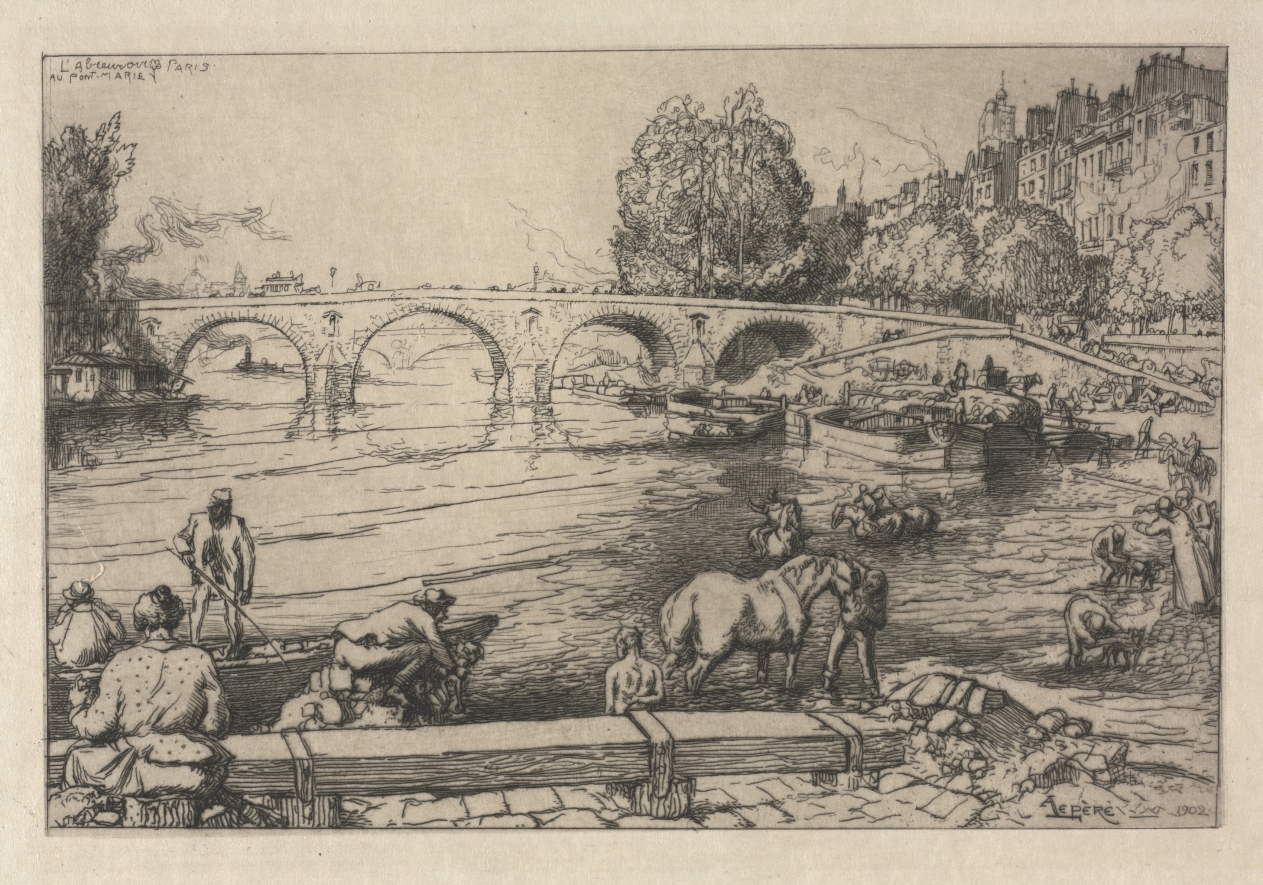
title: The Watering Place at Marie Bridge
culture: France, 19th century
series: Published in Studio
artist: Auguste Louis Lepère (French, 1849–1918)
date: 1902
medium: etching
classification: Print